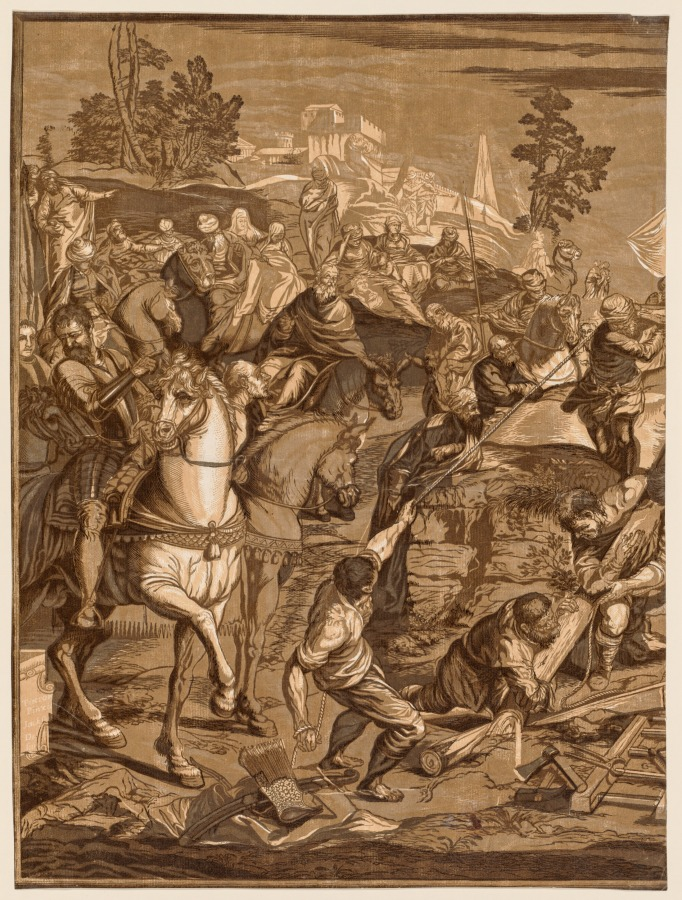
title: Crucifixion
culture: England, 18th century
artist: John Baptist Jackson (British, 1701-c. 1780)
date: 1741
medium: chiaroscuro woodcut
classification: Print